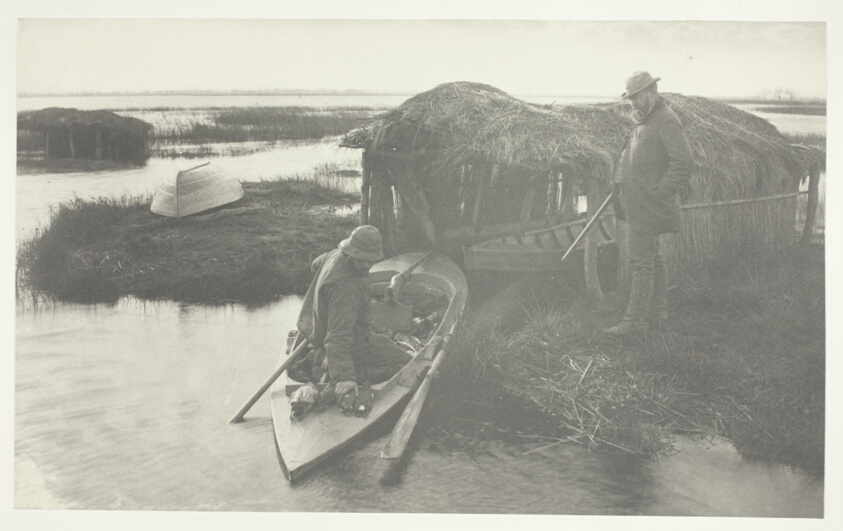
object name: Photograph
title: The Fowler's Return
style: 19th century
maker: Peter Henry Emerson (English, born Cuba, 1856–1936)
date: 1886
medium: Platinum print, pl. XX from the album "Life and Landscape on the Norfolk Broads" (1886)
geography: England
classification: platinum print; photographic process; photography; photograph